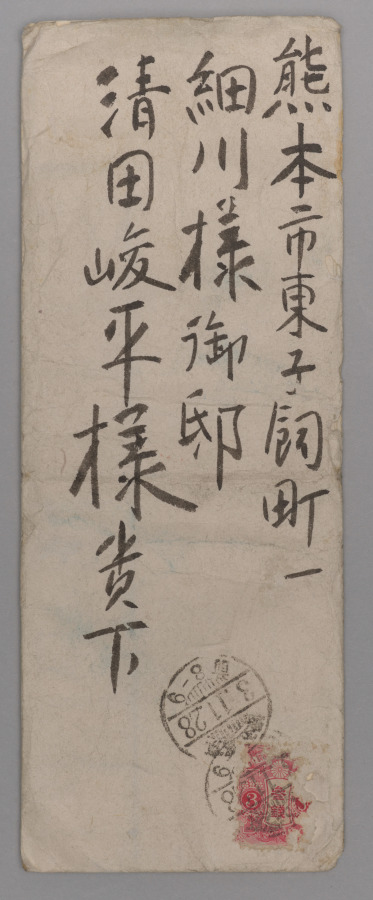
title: Water Container with Peonies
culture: Japan, Meiji period (1868–1912)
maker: Seifū Yohei III (Japanese, 1851–1914)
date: 1900–1914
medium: Porcelain with molded and carved design, green glaze, and black lacquered lid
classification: Ceramic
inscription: 清風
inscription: 帝室技芸員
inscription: 清風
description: This ceramic is an especially accomplished example of Yohei III’s combination of an allover translucent colored glaze with molded and carved designs. It features the peony as its primary motif. The water container, or mizusashi, has a green glaze, and its design takes into consideration the rounded shape and the seated position of the host and guests. It begins low on the body with a flower just beginning to open and continues with another flower a bit higher up, with its petals fully extended and beginning to open outward. It finishes with a flower in full bloom, petals and leaves unfurled and spread outward from the center, now occupying almost the entire surface. The water container once belonged to the Hosokawa family, whose go-between corresponded with Yohei IV about the piece. Yohei IV thanked them for their payment and requested that despite his father’s death in the previous year, they continue to favor the studio with their orders. The letter and its envelope, as well as an auction tag, remain with the object.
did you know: This water container may also serve as a site for cultural reckoning, as when the life cycle of a flower prized in East Asia as a symbol of wealth is displayed across a Japanese chanoyu vessel whose glaze is associated with the seats of power in China and Korea.